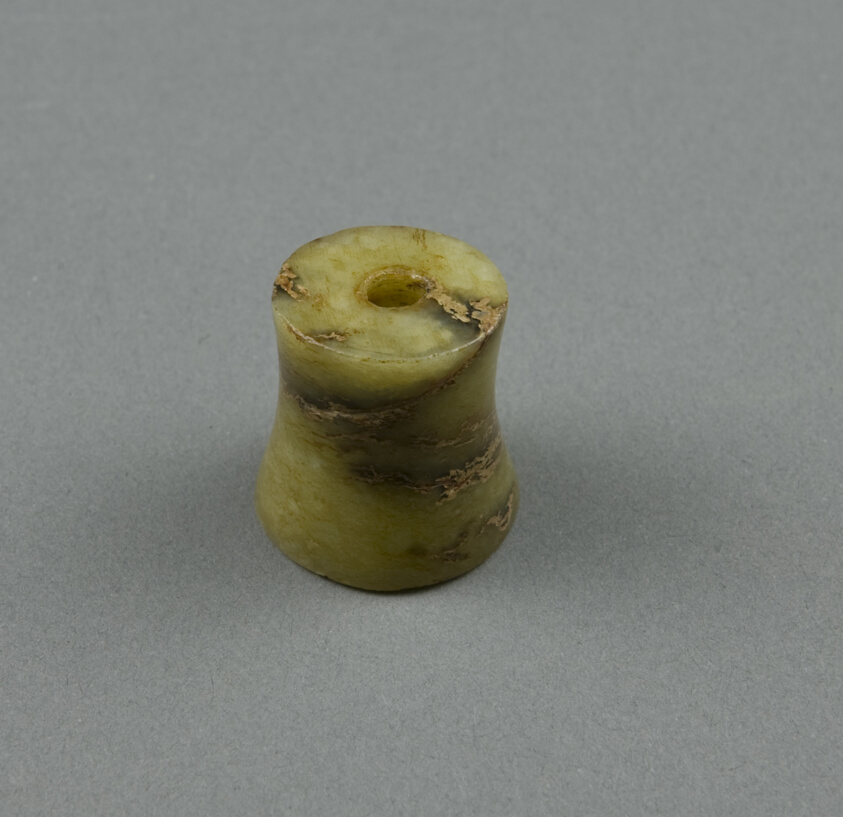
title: Bead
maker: China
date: Early Western Zhou dynasty (1047BC-772BC)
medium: Jade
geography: China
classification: jade; asian art